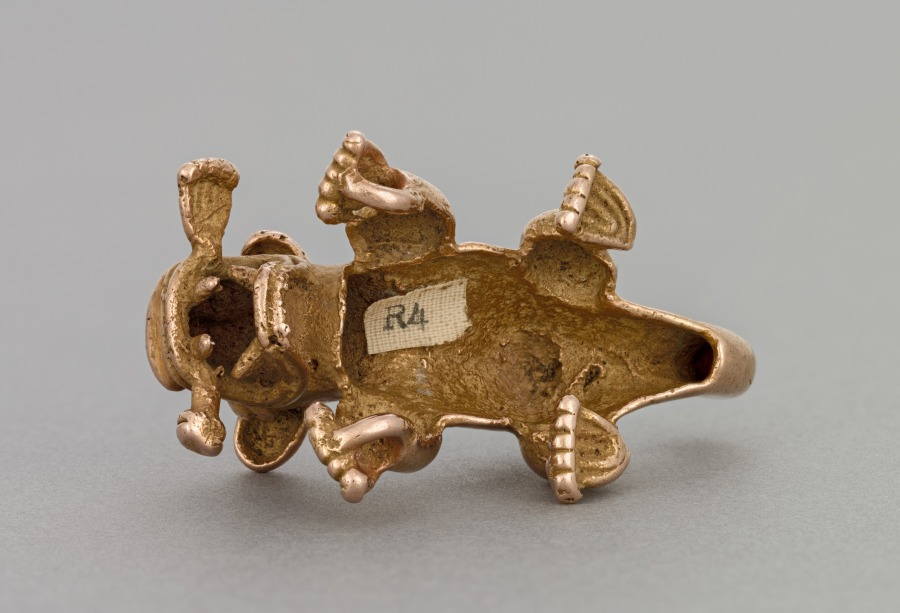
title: Feline Pendant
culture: Isthmian Region, Panama-Costa Rica, Veraguas-Chiriquí style, 11th century-16th century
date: 1000–1550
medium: gold, cast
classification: Metalwork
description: This memorable jaguar pendant is a nasty precious—nasty because it holds a severed limb (probably human) in its fanged mouth but precious due to its material, its well-polished silky surface, and the charming rendering, which reduces the jaguar to cartoon-like essentials. The warm, rosy color is the result of copper in the alloy.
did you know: In the Panama-Costa Rica region gold ornaments were associated with political and religious authority.